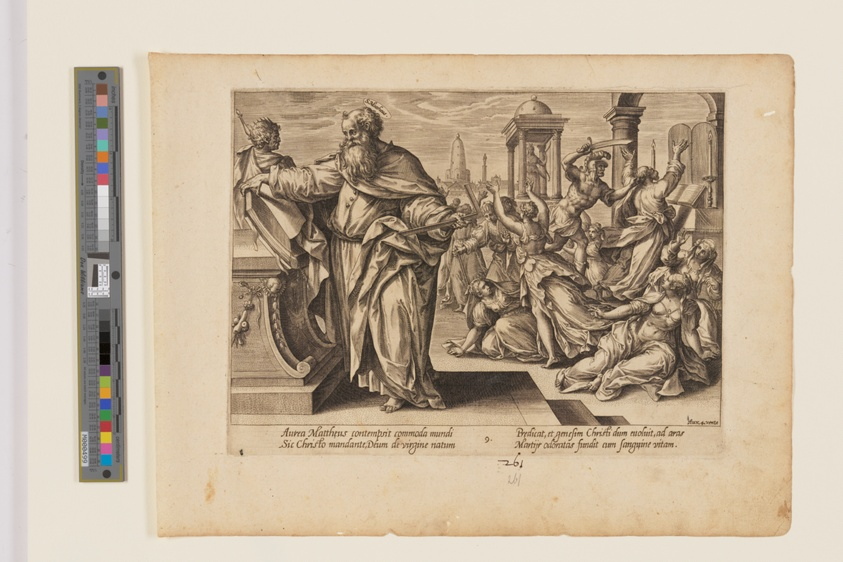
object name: Print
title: he Martyrdom of St Matthew, from The Martyrdom of Christ and the Apostles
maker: Hendrick Goltzius (Dutch, 1558–1617); after Maarten de Vos (Flemish, 1532–1603); published Hieronymus Cock (Netherlandish, c. 1510–1570)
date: c. 1578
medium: Engraving on ivory laid paper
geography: Netherlands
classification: engraving; paper; print; prints and drawing